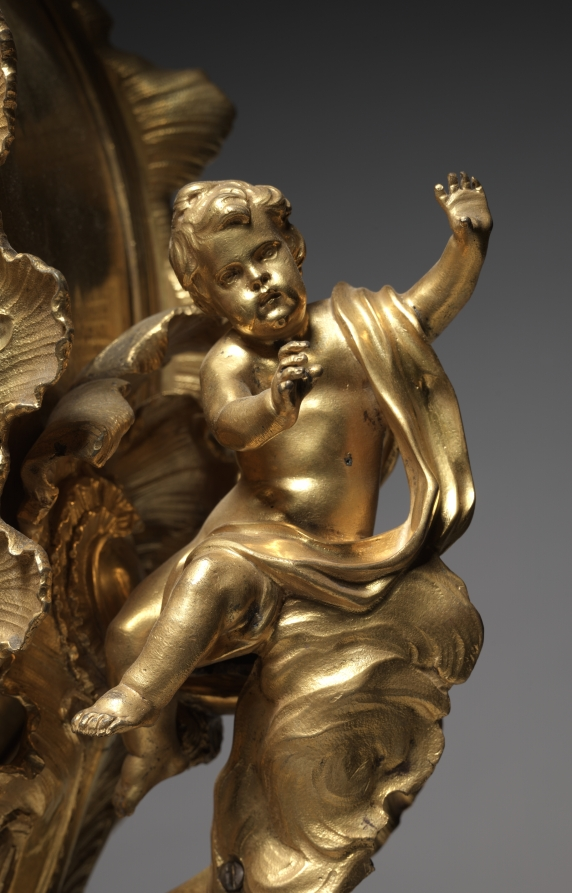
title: Clock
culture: France, 18th century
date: c. 1750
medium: gilt bronze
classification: Furniture and woodwork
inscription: on clock face: JOUARD A PARIS; engraved on plaque attached to back of clock face: Jouard Paris.